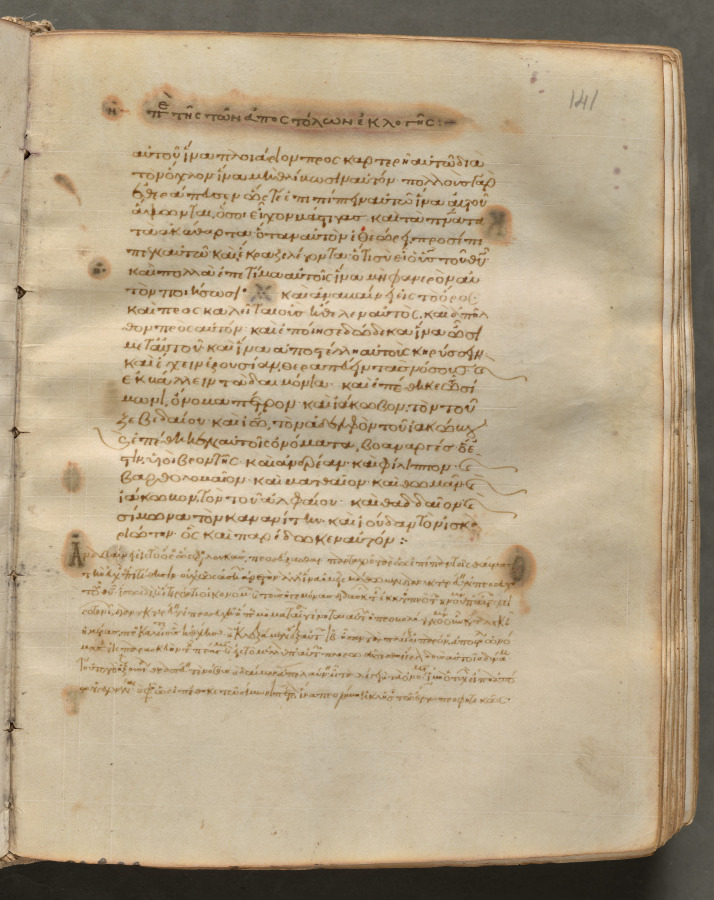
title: Text, folio 141 (recto), from a Gospel Book with Commentaries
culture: Byzantium, Constantinople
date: c. 1000–1100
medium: ink, tempera, and gold on vellum; leather binding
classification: Bound Volume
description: Each of the four gospels in this book opens on a page with brilliantly illuminated borders depicting the author of the text as well as birds-principally peacocks, symbols of the immortality of the soul-and fountains, representing the fountain of life and the salvation of the soul. This volume consists of 428 leaves with texts in Greek. Its level of sophistication suggests that it was probably written and decorated in a monastery in Constantinople.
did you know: Gospel Books were carried in procession through Byzantine churches.